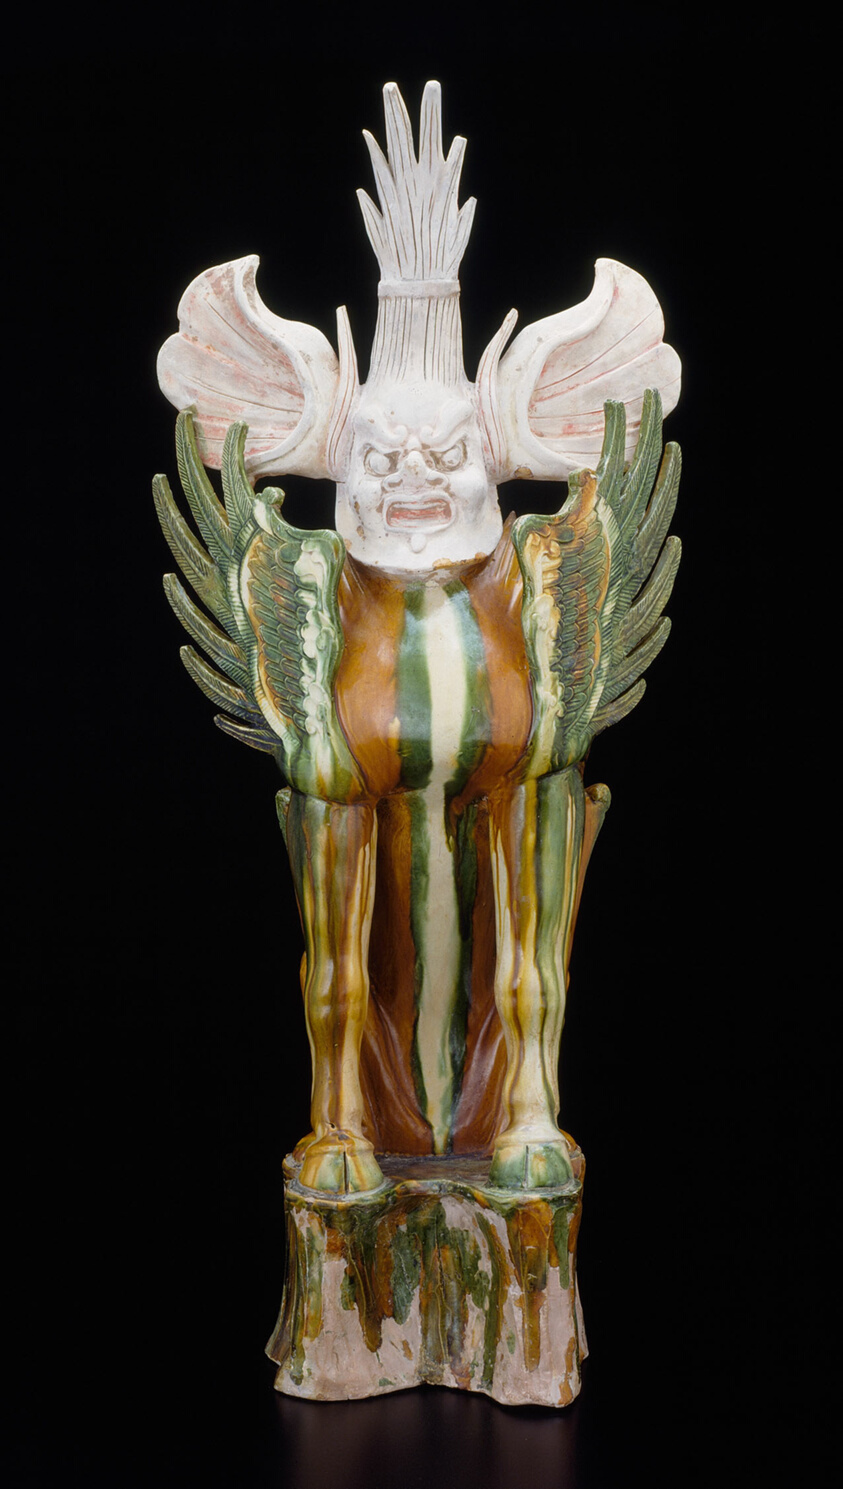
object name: Decorative Arts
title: Ogre-Headed Guardian Beast (Zhenmushou)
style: Chinese (culture or style)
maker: China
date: Tang dynasty (618–907), first half of 8th century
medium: Earthenware with three-color (sancai) lead glazes and traces of pigments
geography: China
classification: earthenware; ceramics; asian art; decorative arts